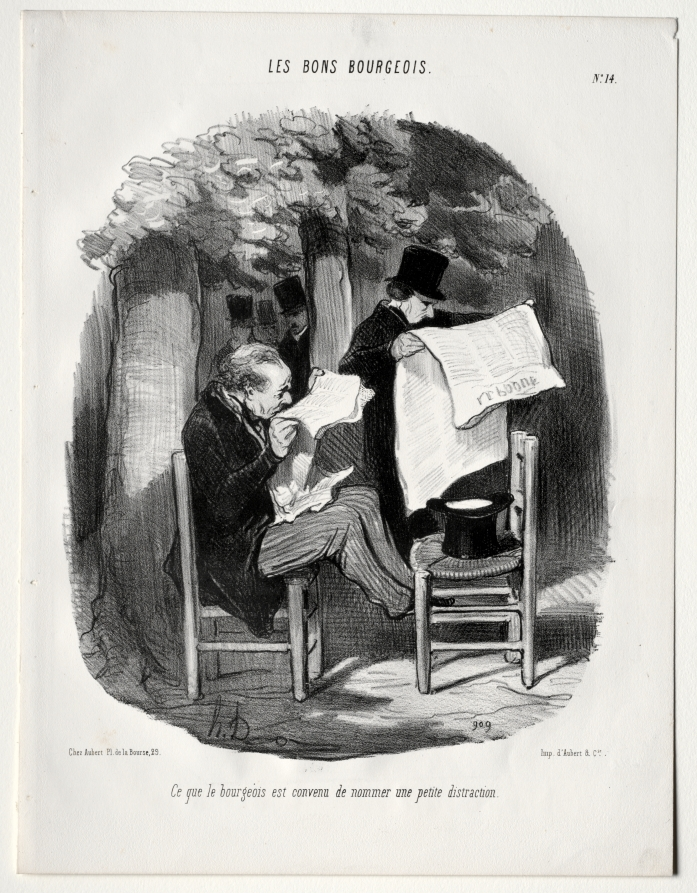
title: What the bourgeois calls a slight distraction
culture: France, 19th century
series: The Good Bourgeois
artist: Honoré Daumier (French, 1808–1879)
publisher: Aubert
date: 1846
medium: lithograph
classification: Print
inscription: Above image, printed: LES BONS BOURGEOIS. / No.14. ; Below image, printed: Ce que le bourgeois est convenu de nommer une petite distraction.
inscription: Lower margin, printed: Chez Aubert, Pl. de la Bourse, 29. / Imp. d'Aubert & Cie. ; verso, in pencil: a 98643 / 22.282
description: This print was published in Le Charivari (August 30 1846) as plate 14 from the series The Good Bourgeois.